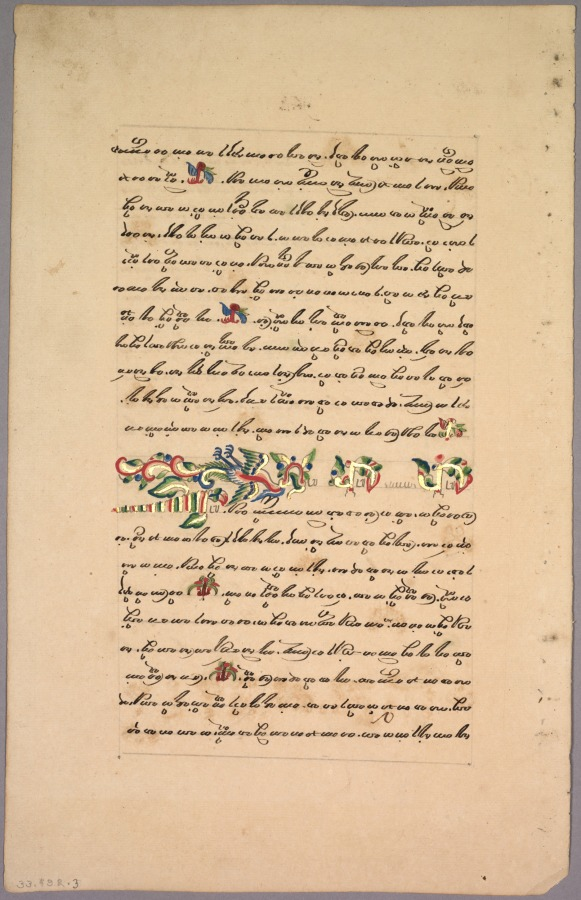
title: Page from Ramayana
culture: Java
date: 1800s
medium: ink on paper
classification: Manuscript